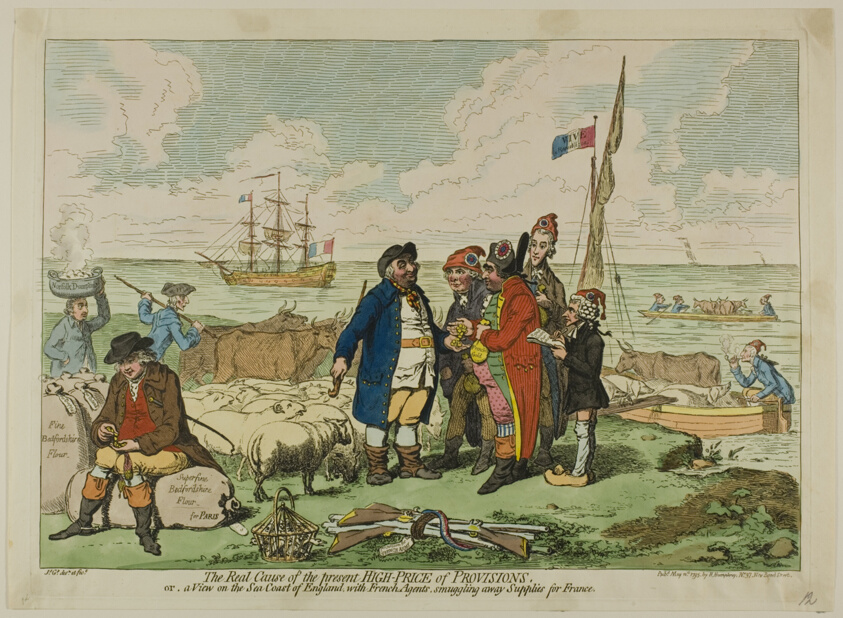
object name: Print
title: The Real Cause of the Present High-Price of Provisions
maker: James Gillray (English, 1756-1815); published by Hannah Humphrey (English, c. 1745-1818)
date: published May 11, 1795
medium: Hand-colored etching on paper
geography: England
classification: etching; print; prints and drawing